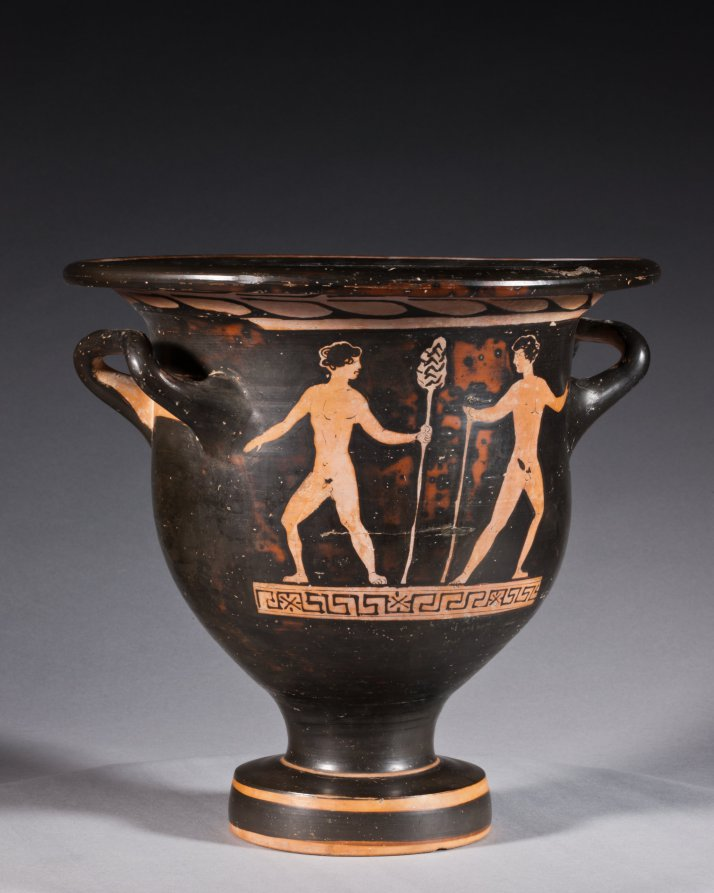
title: Red-Figure Bell Krater (Mixing Vessel): Aphrodite and Eros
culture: South Italian, Apulian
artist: attributed to Graz Painter (South Italian, Apulian, active c. 380–360 BCE)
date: c. 370–360 BCE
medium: ceramic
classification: Ceramic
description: This small mixing vessel shows a finely dressed woman seated on a chest and holding up a mirror to admire herself. Before her stands Eros, the winged god of love, holding a ribbon or sash. Behind the woman stands a pillar with the inscription ΑΦΡΟΔΙΤΗ, or APHRODITE, the goddess of love. Such labels are rare on vases, and scholars debate whether this names the woman shown as Aphrodite herself, with her son Eros, or a bride envisioning herself as Aphrodite, just before her wedding.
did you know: The dancing nude youths on the reverse are unusual; typically they would be standing and draped.